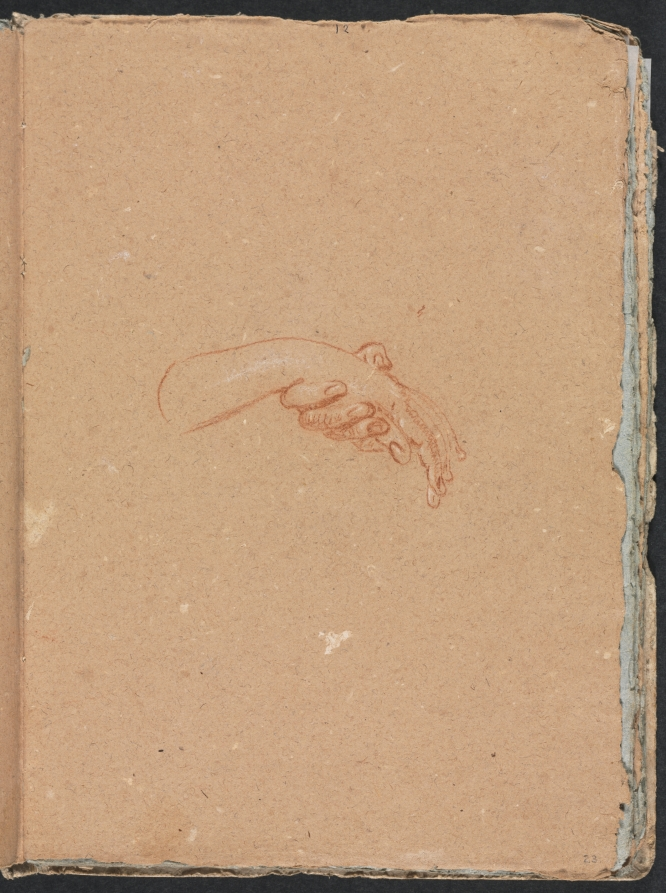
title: Verona Sketchbook: Study of hands (page 23)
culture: Italy, 18th century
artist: Francesco Lorenzi (Italian, 1723–1787)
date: 1760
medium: Red chalk with white heightening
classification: Bound Volume